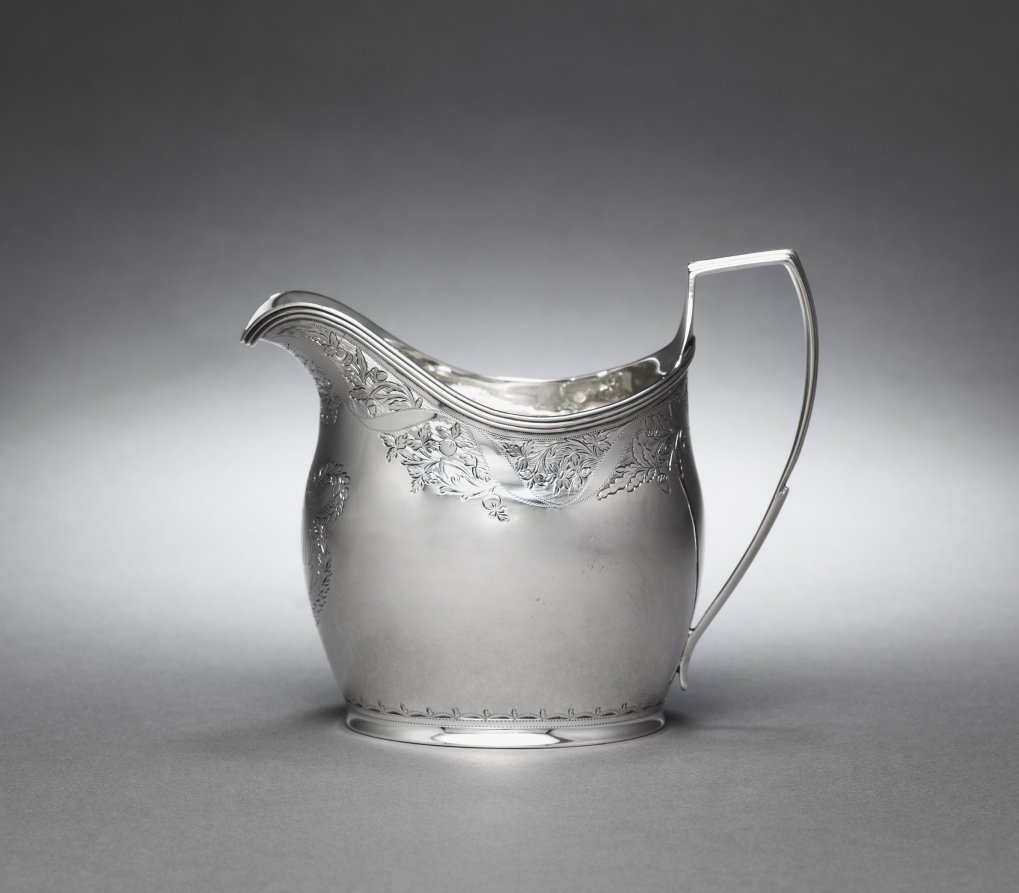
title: Tea Service (Creamer)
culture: London, England, 19th century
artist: Anne Bateman (British, 1748–1813)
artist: Peter Bateman (British, 1740–1825)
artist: William (I) Bateman (British, 1774–1850)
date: 1807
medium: silver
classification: Silver